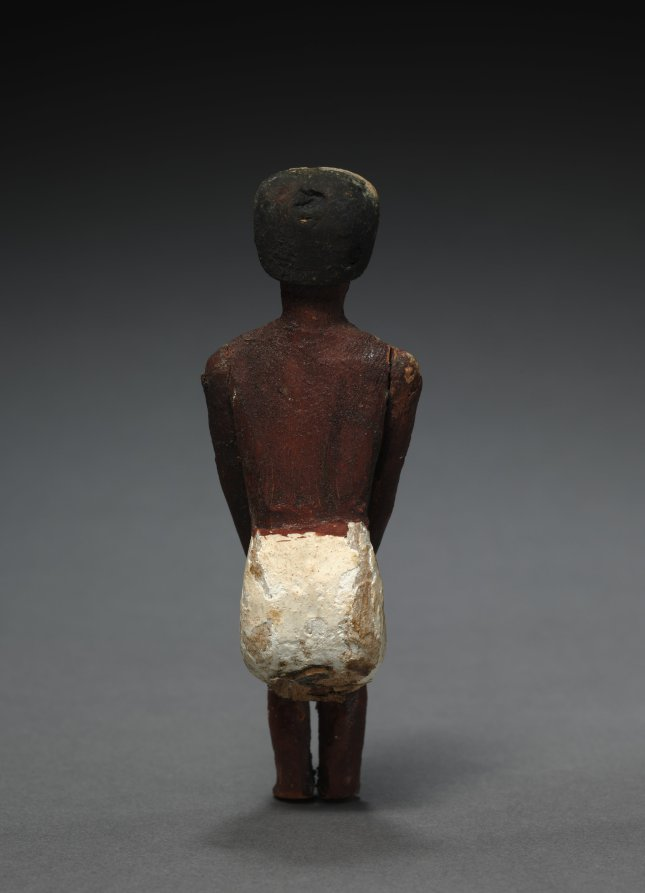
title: Seated Model Sailor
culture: Egypt, Middle Kingdom (2040–1648 BCE), Dynasties 11–12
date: c. 2000–1000 BCE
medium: painted sycamore fig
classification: Funerary Equipment